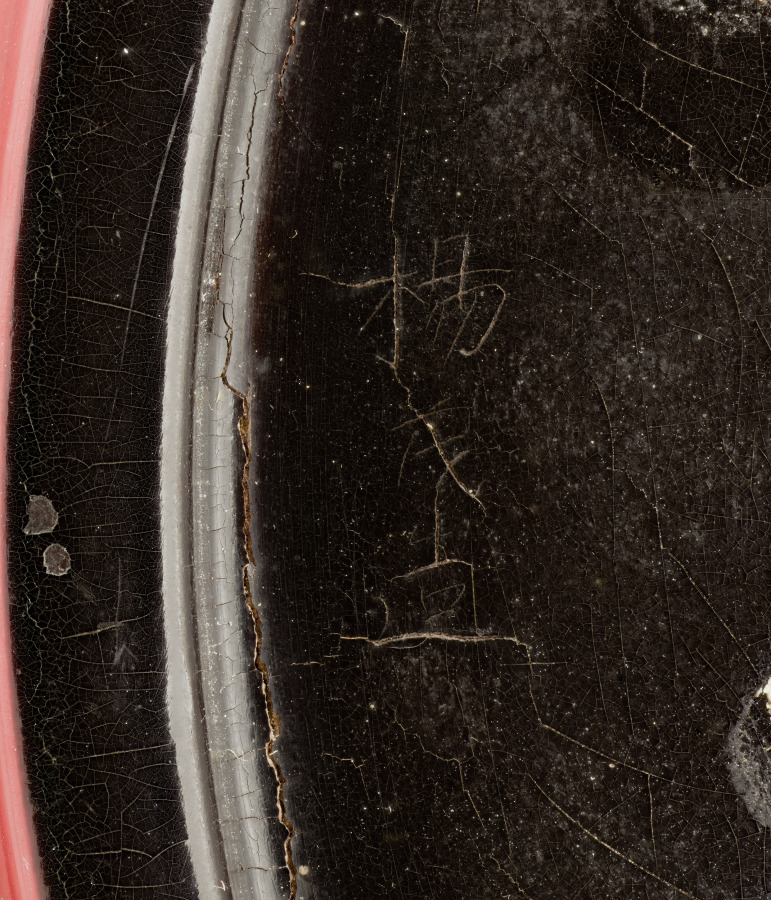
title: Plate with Peony Decoration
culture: China, Yuan dynasty (1271-1368)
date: late 1300s–early 1400s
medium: carved cinnabar lacquer on wood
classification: Lacquer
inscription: Signature incised on bottom: Yang Mao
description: This lacquer dish of strikingly deep red color is decorated with a dynamically carved design of three peony blossoms. Because of the complexity in lacquer production, items are often small and were seldom made for daily use. Lacquer was traditionally made using the sap of the lacquer tree found in southern China. Many successive layers of lacquer would be applied until the surface could be carved into complex geometric or figural forms. Red became the preferred color for lacquerware carvings, in part because the color has long been associated with good fortune in China.